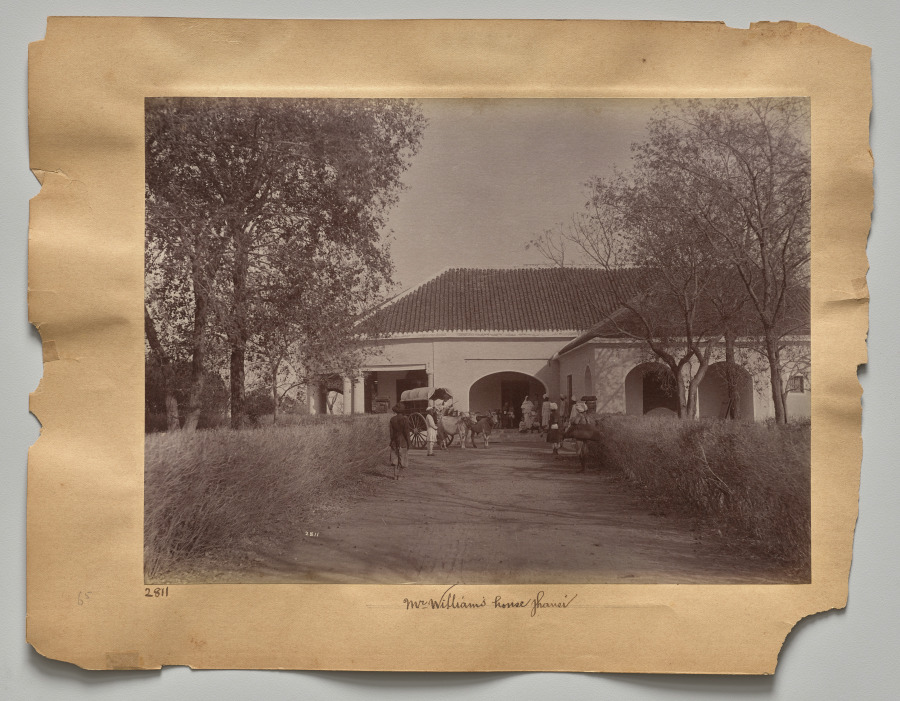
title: Mr. William's House, Jhansi (verso)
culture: India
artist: Raja Deen Dayal (Indian, 1844–1905)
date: c. 1882–87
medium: albumen print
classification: Photograph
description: These photographs are part of an album, now disassembled, of around 105 photographs taken in India between 1885 and summer 1887 that provide glimpses into the lives of the British colonial elite and royal and upper-class Indians. The museum holds another group of 37 pictures from this album (2016.266), which was probably commissioned by a British civil servant visiting or working in India around 1888 as a personal souvenir of his experiences there.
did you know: Raja Deen Dayal is regarded now, and was considered during his lifetime, to be India’s most important 19th-century photographer.